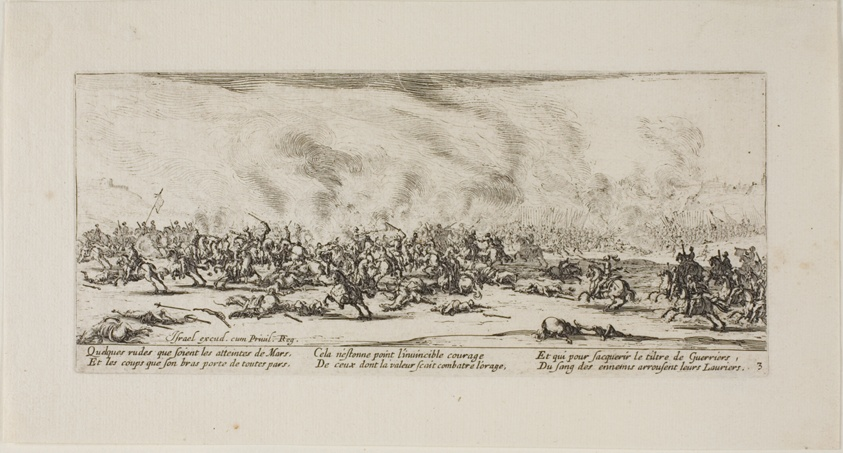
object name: Print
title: The Battle, plate three from The Miseries of War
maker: Jacques Callot (French, 1592-1635); published by Israël Henriet (French, 1590-1661)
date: 1633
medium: Etching on paper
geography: France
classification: etching; print; prints and drawing